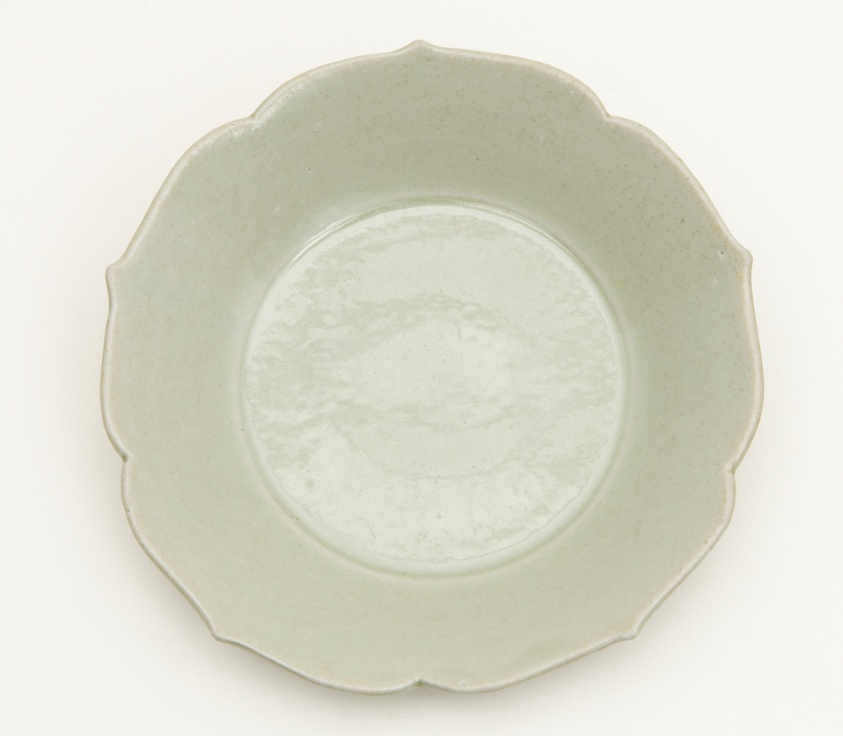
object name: Vessel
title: Pair of Foliate-Rimmed Dish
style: Chinese (culture or style)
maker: China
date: Five Dynasties period (907–960) or Northern Song dynasty (960–1127), 10th century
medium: Yue ware; glazed stoneware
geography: China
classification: dish (vessel); vessel